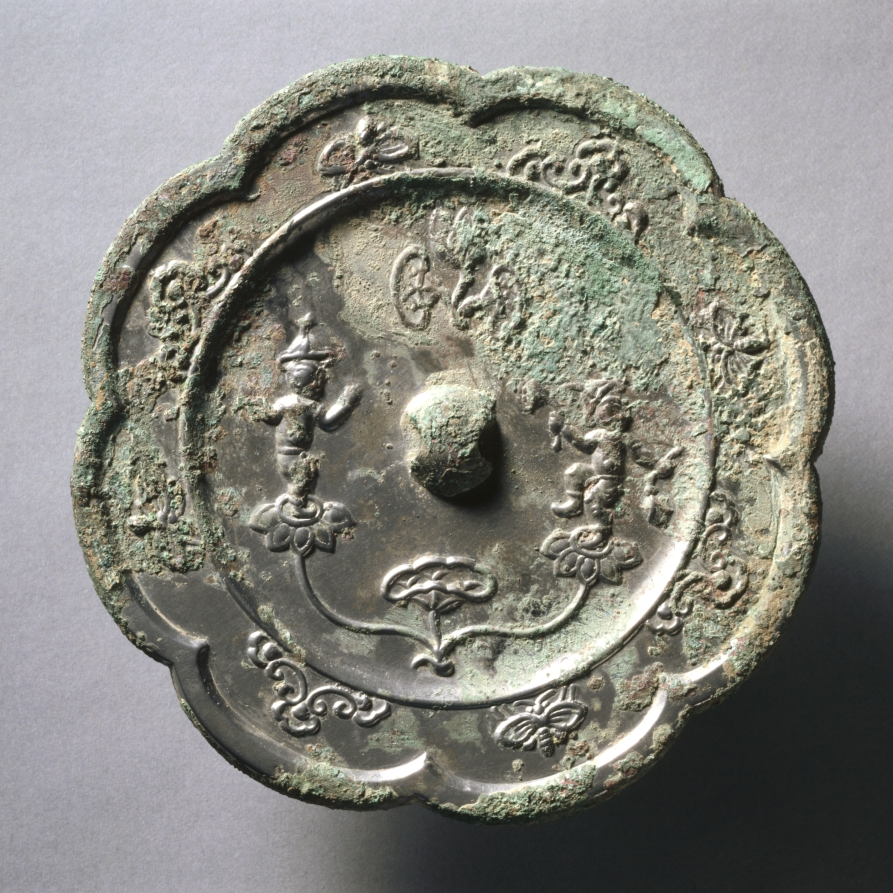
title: Lobed Mirror with Acrobats on Lotus Blossoms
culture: China, Tang dynasty (618-907)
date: early 600s-early 900s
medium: bronze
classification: Metalwork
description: The reflecting surfaces of the mirrors were smooth and highly polished. Although much of the reflecting surface is corroded here, a small area of the original polished surface can be observed.